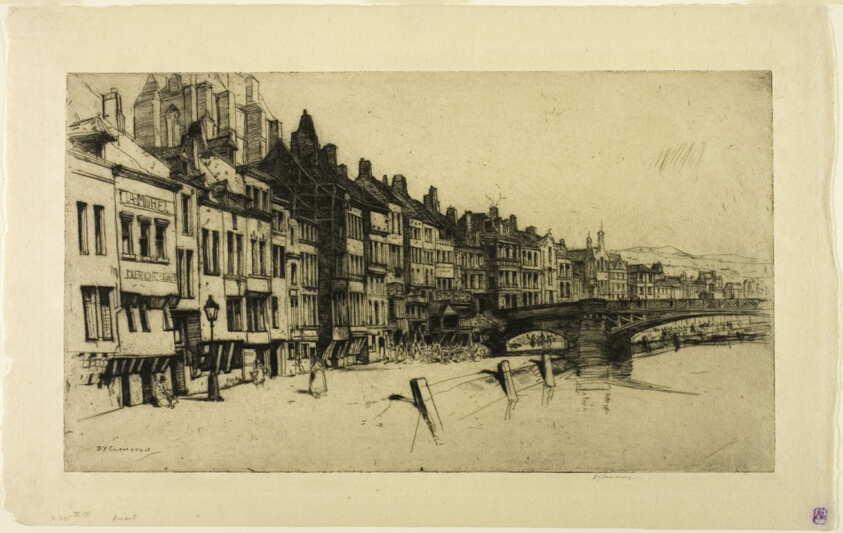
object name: Print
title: Dinant, plate nine from the Belgian Set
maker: David Young Cameron (Scottish, 1865-1945)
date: 1907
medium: Etching and drypoint on paper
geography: Scotland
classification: etching; print; prints and drawing